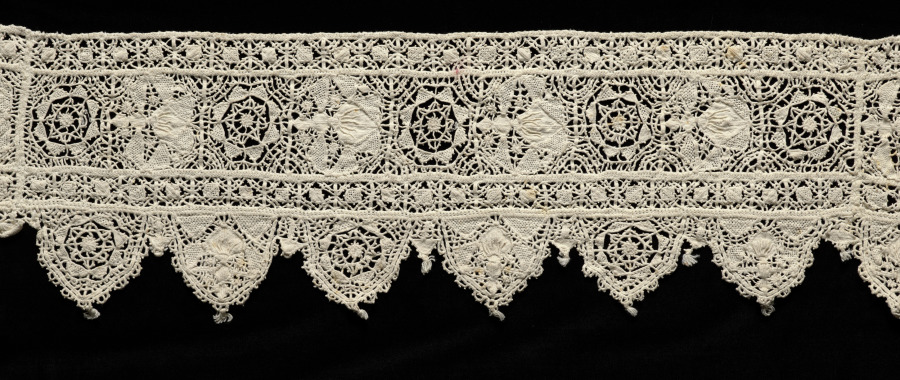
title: Lace Edging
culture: Italy, 1600s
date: 1600s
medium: Linen: needle lace (reticella)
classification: Lace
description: In this piece of lace edging, squares with a geometric design alternate with a motif of a bee, the symbol of the Barberini family.